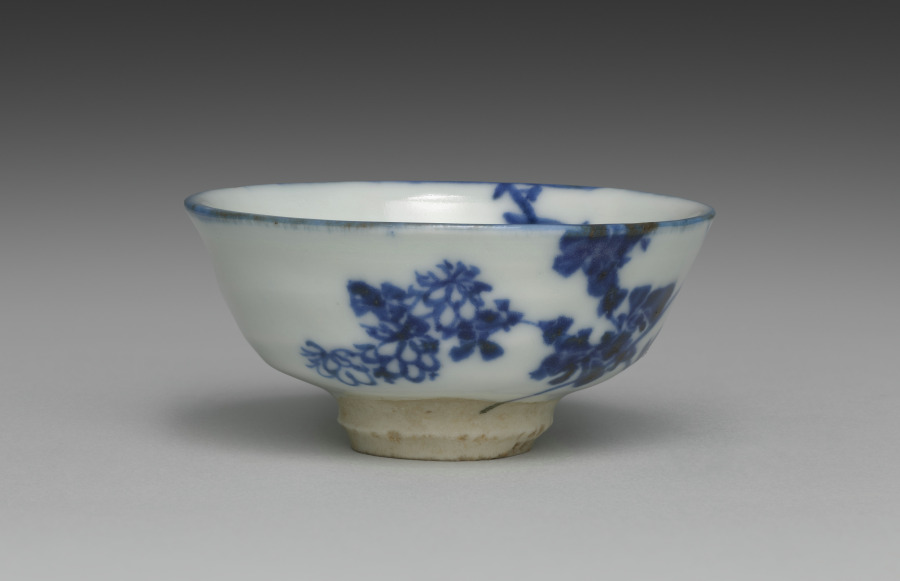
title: Sake Cup with Auspicious Plants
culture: Japan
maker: Seifū Yohei II (Japanese, 1844–1878)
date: 1861–78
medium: One of a pair of sake cups; porcelain with underglaze blue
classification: Ceramic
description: Seifū Yohei II excelled as a painter, as evidenced by his floral and landscape designs. His works were selected as the best among Kyoto ceramics shown to jurists from Europe and the US, thus paving the way for international recognition of the studio in the late 1800s.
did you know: Orchid, bamboo, chrysanthemum, and plum all appear on this cup and have associations with the four seasons.